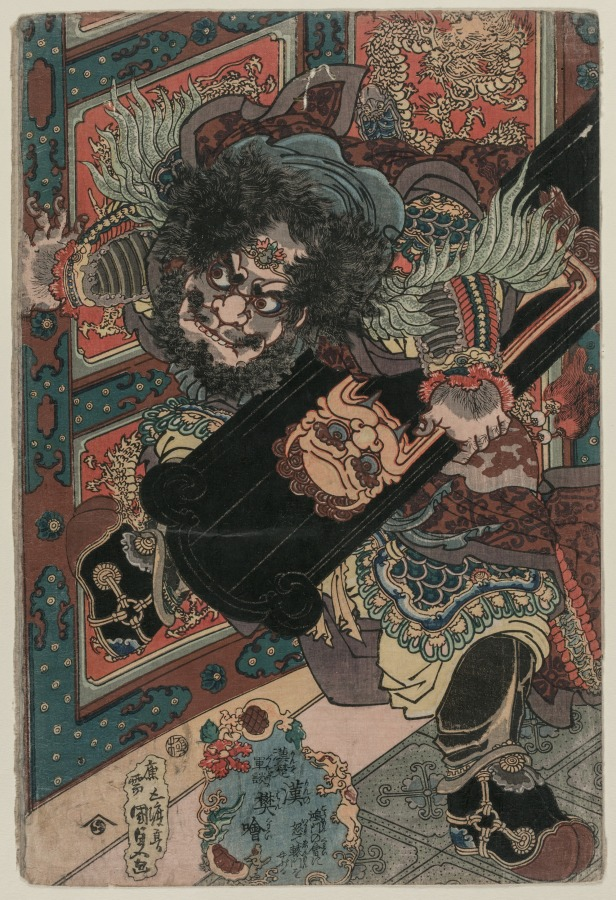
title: The Military Tales of Han and Chu: Fan Kuai of the Han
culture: Japan, Edo period (1615–1868)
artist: Utagawa Kunisada (Japanese, 1786–1865)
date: c. late 1820s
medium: color woodblock print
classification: Print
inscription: Signature: Oju Gototei Kunisada fa Publisher: Nishimura Eijudo (emblem) Censorship Seal: kiwame